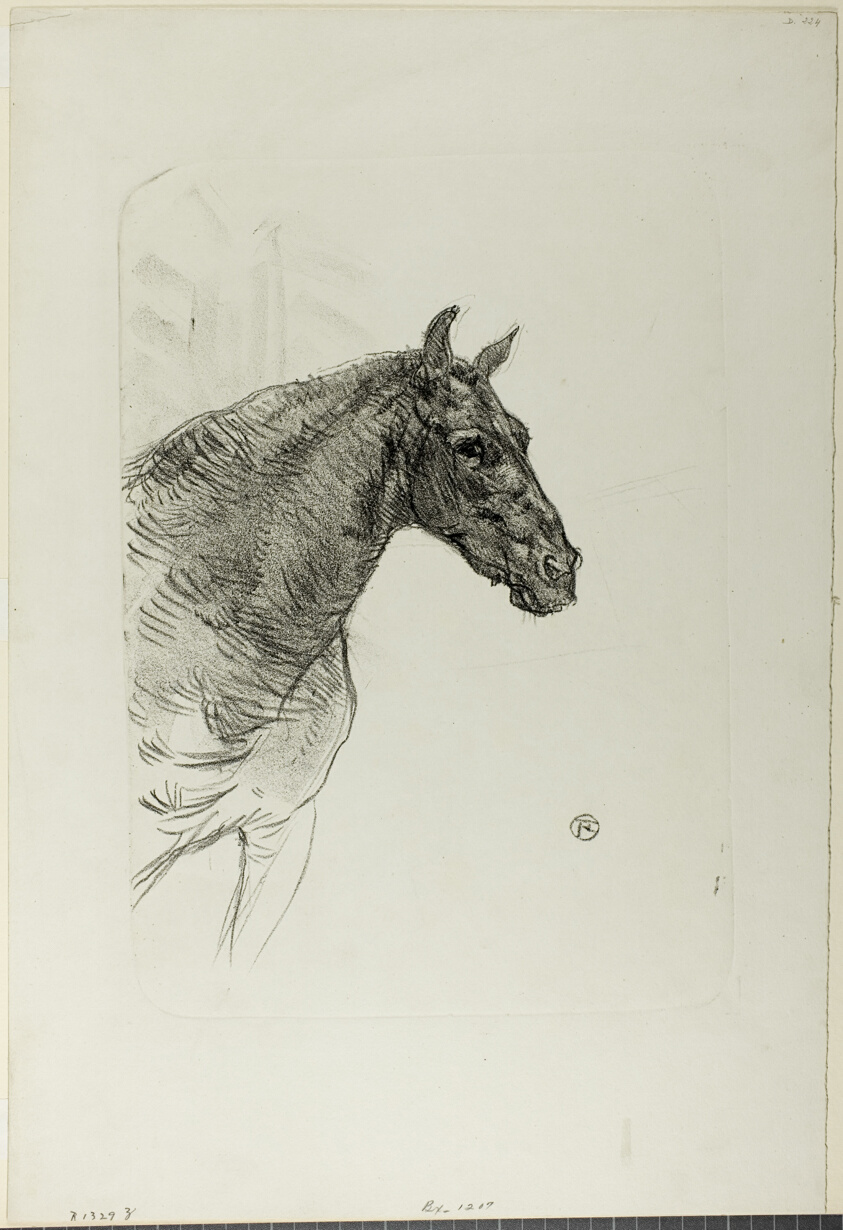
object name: Print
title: Philibert the Pony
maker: Henri de Toulouse-Lautrec (French, 1864-1901)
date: 1898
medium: Lithograph on ivory wove paper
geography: France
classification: lithograph; print; prints and drawing